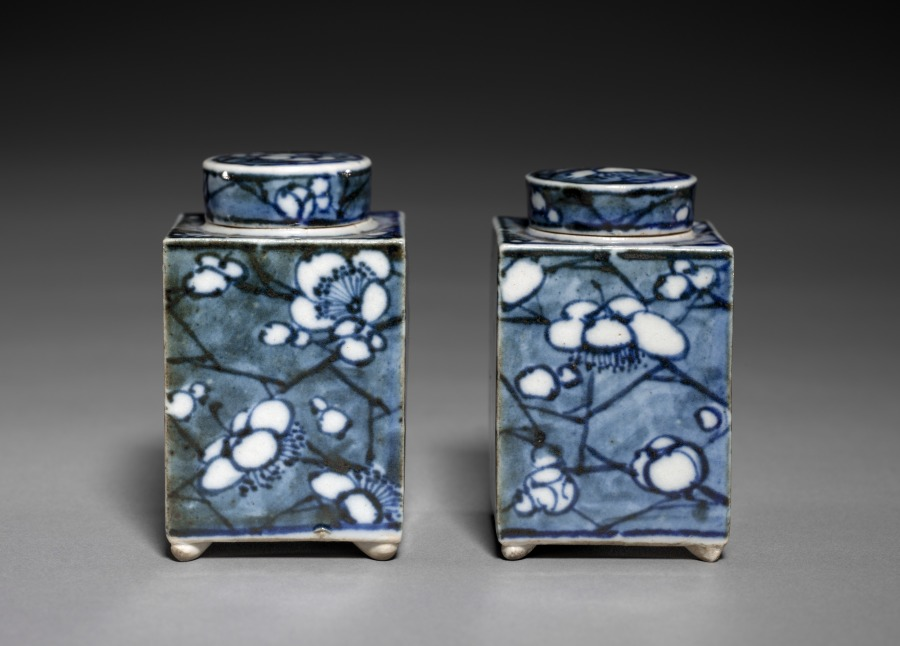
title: Pair of Tea Containers with Plum Blossoms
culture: Japan, Edo period (1615–1868)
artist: Aoki Mokubei (Japanese, 1767–1833)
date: early 1800s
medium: porcelain with underglaze blue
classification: Ceramic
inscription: signed "Ro Mokubei" on base in underglaze blue.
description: Aoki Mokubei, born into a family of restaurateurs, was a potter, calligrapher, painter, and scholar, and is considered one of the three masters of later Edo period Kyoto ceramics. He specialized in porcelains fashioned after Chinese prototypes, and created works for steeped tea (sencha) such as these matching tea caddies decorated in an underglaze blue called sometsuke—literally “with applied dye.” He signed them on their bottoms. They also have intricately patterned silk sleeves to both beautify and protect them. On the exterior of the lid of the outer wooden box that contains them, it is written that Mokubei inscribed and painted an image on the box. On the interior of the lid, the signature and seals of a former owner are written. Mokubei has signed the lid of the inner box, and a charming ink and light color composition of West Lake in Hangzhou in China covers its three sides. On the fourth side is a long inscription by Mokubei describing the scene.